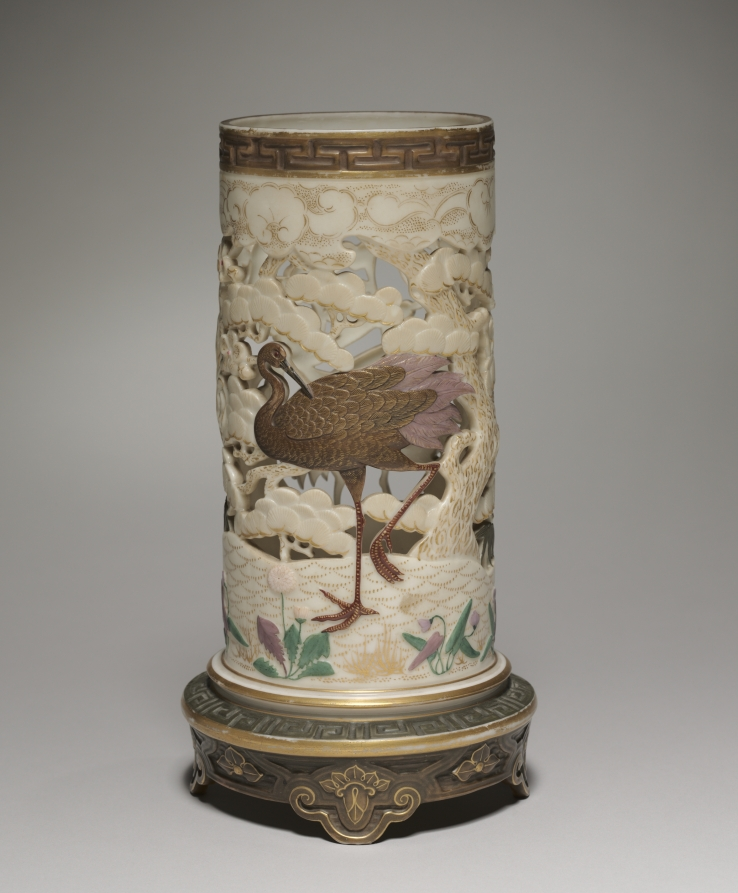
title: Vase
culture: England, 19th century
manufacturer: Worcester Porcelain Factory (British, established 1751)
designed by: probably by James Hadley (British)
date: 1873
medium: ceramic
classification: Ceramic